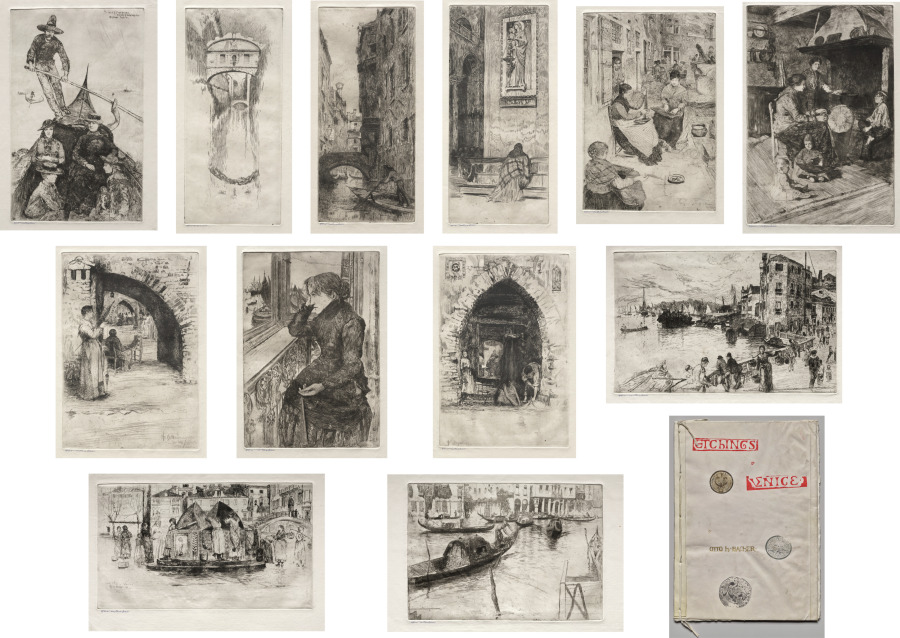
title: Etchings of Venice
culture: America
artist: Otto H. Bacher (American, 1856–1909)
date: 1881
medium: etching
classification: Print